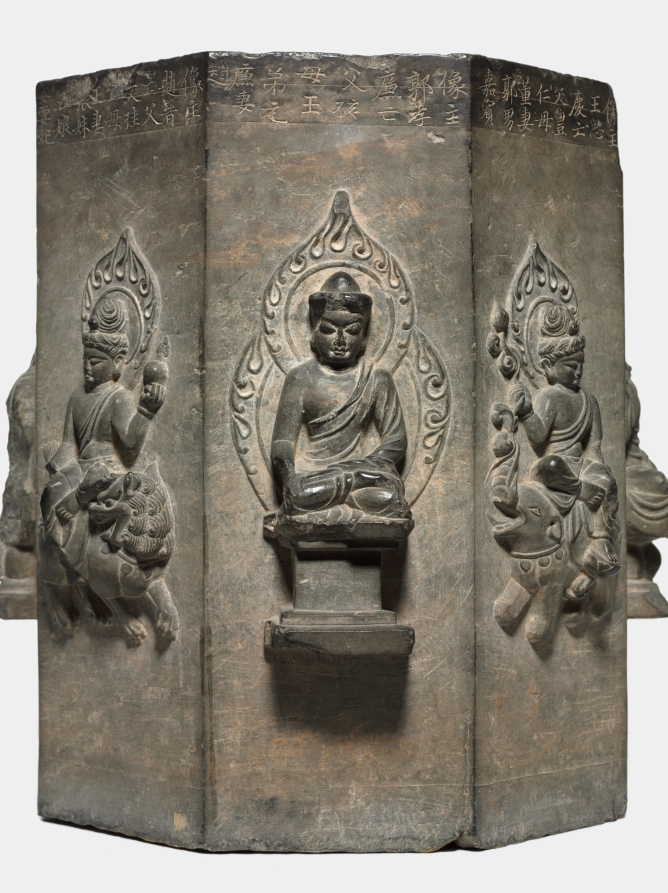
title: Section of a Dharani Pillar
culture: China, Tang dynasty (618-907)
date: 618–907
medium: limestone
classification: Sculpture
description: This octagonal stone pillar, with Buddhist figures carved on its eight sides, is part of a dharani pillar commissioned by Buddhist believers to pay tribute to the dead. The eight inscriptions seen here are eulogies dedicated by eight families to their deceased family members. Dharanis were a form of spell in Esoteric Buddhism said to possess supernatural power when being recited or carried and were incorporated into sutras, such as the Buddha Usnisa Vijaya Dharani Sutra. Dharani pillars, also called sutra pillars, became the dominant bearers of Usnisa Vijaya Dharani which supposedly helped sentient beings prolong life and destroy hardships of the eternal cycle of life and the realms of hell.